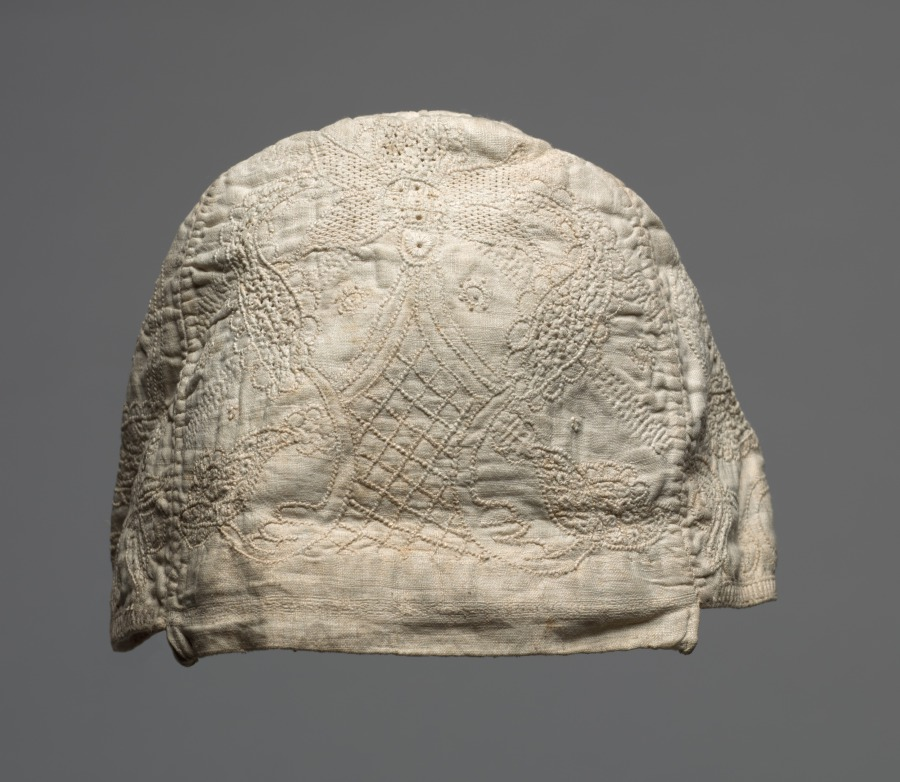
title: Cap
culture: Germany, Hesse, 19th century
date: 1800s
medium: Plain weave linen: needle lace (drawnwork) and embroidery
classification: Embroidery